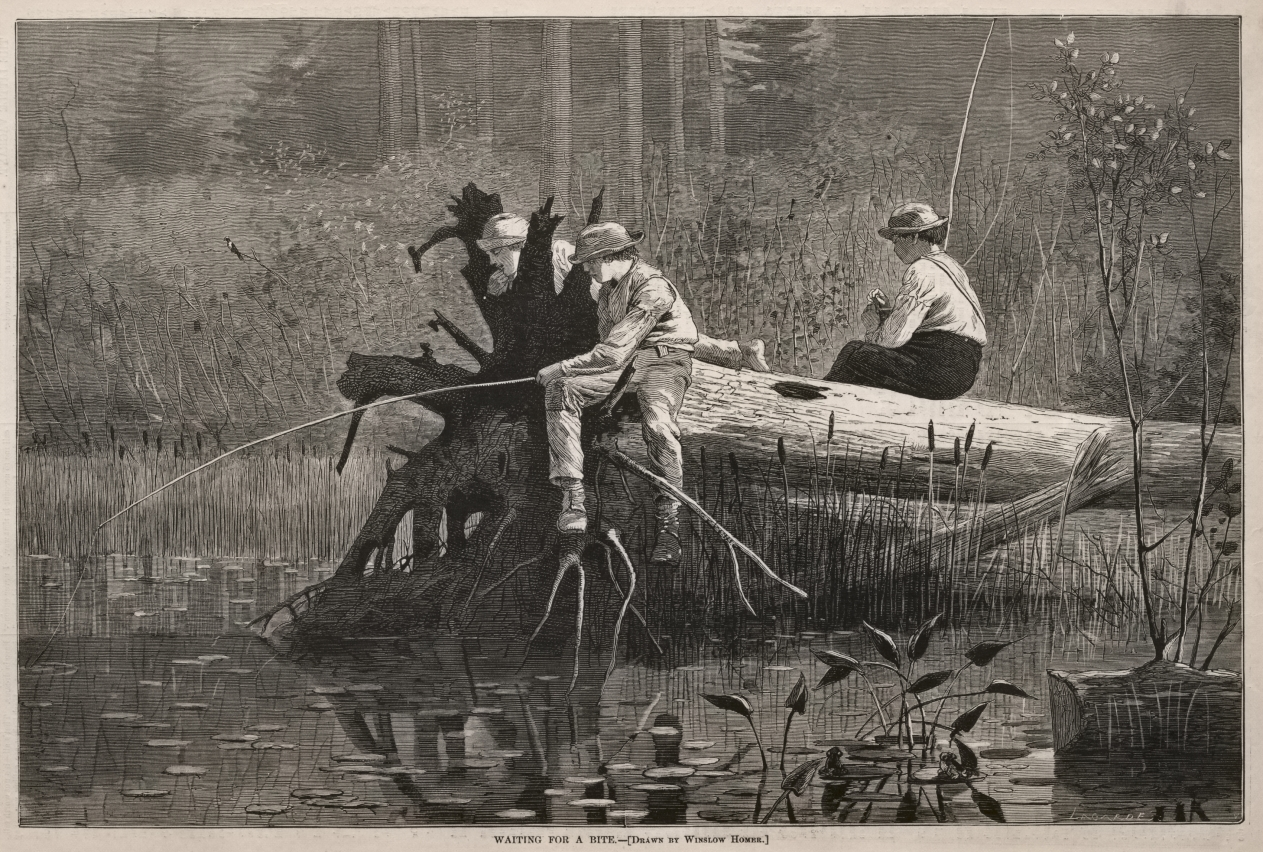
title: Waiting for a Bite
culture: America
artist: Winslow Homer (American, 1836–1910)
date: 1874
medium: wood engraving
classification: Print